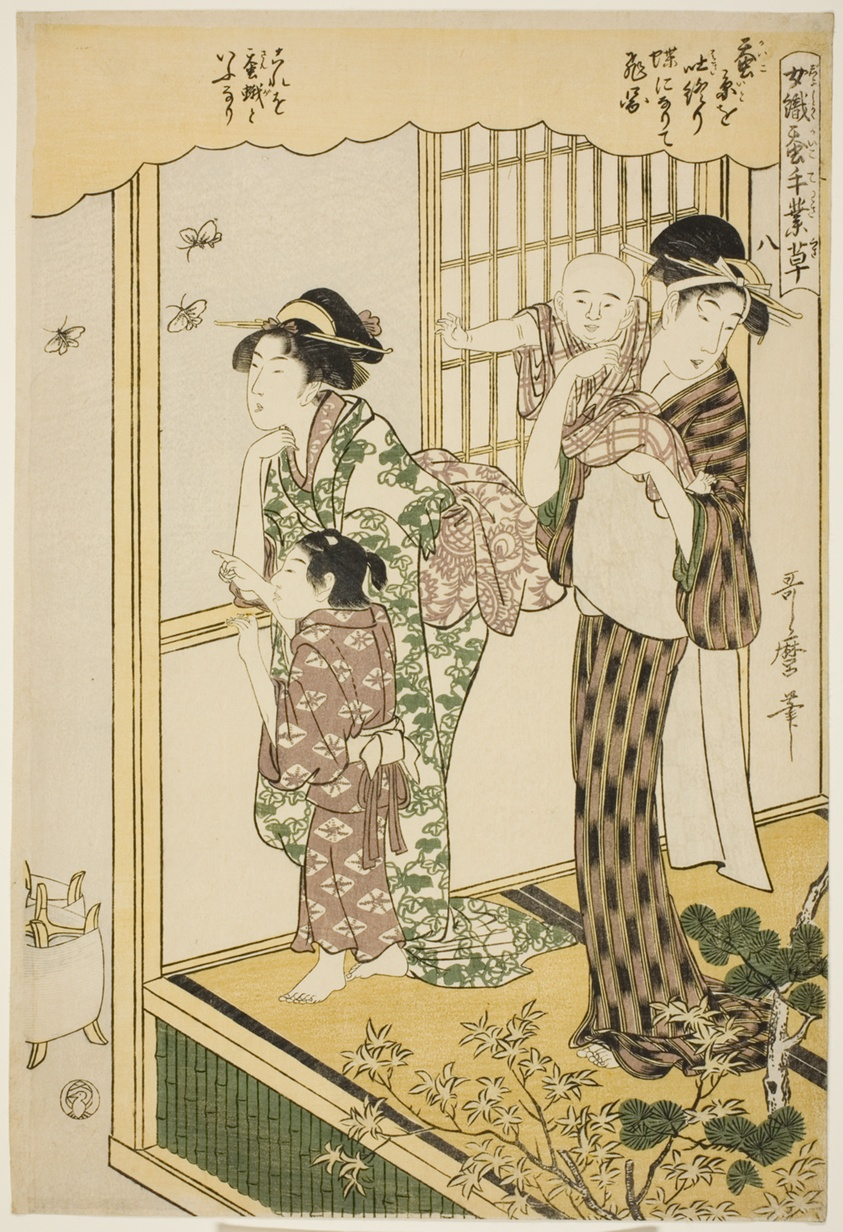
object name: Print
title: No. 8 (hachi), from the series "Women Engaged in the Sericulture Industry (Joshoku kaiko tewaza-gusa)"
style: Japanese (culture or style)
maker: Kitagawa Utamaro 喜多川 歌麿; Japanese, 1753 (?)-1806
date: c. 1798/1800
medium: Color woodblock print; oban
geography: Japan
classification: woodblock print; print; asian art